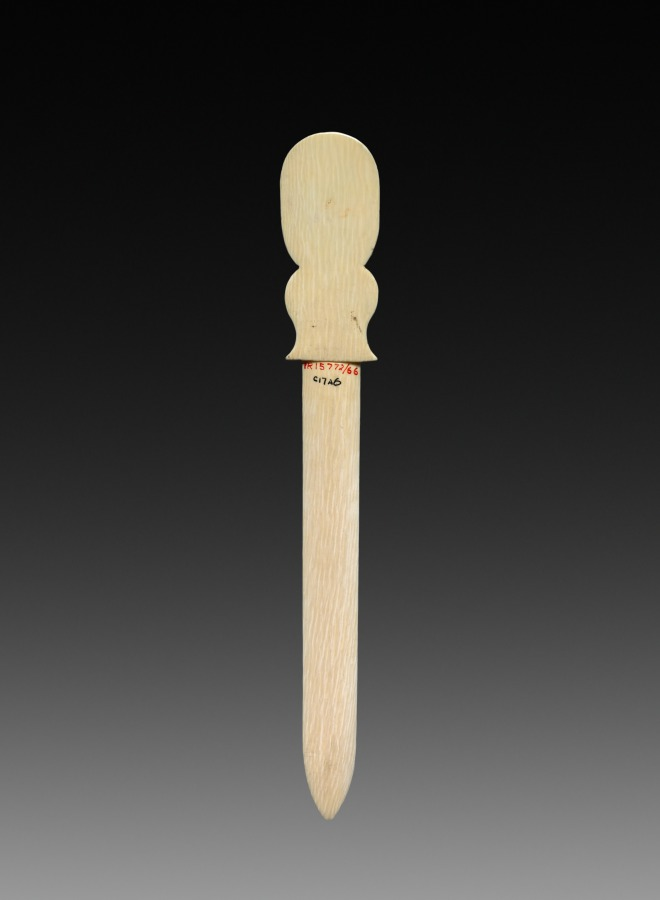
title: Paper Knife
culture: Japan, Meiji period (1868–1912)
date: early 1900s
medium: Carved ivory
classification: Ivory